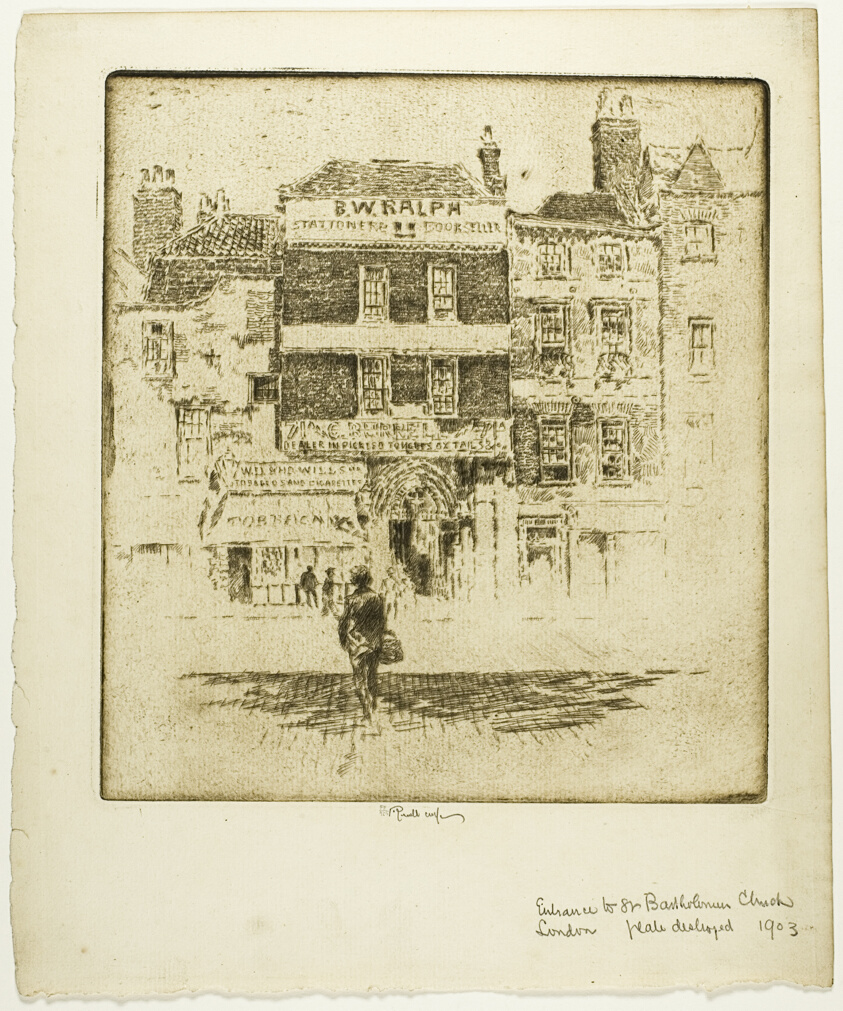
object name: Print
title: Saint Bartholomew's Gate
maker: Joseph Pennell (American, 1857-1926)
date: 1907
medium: Etching on heavy ivory laid paper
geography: United States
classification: etching; print; prints and drawing